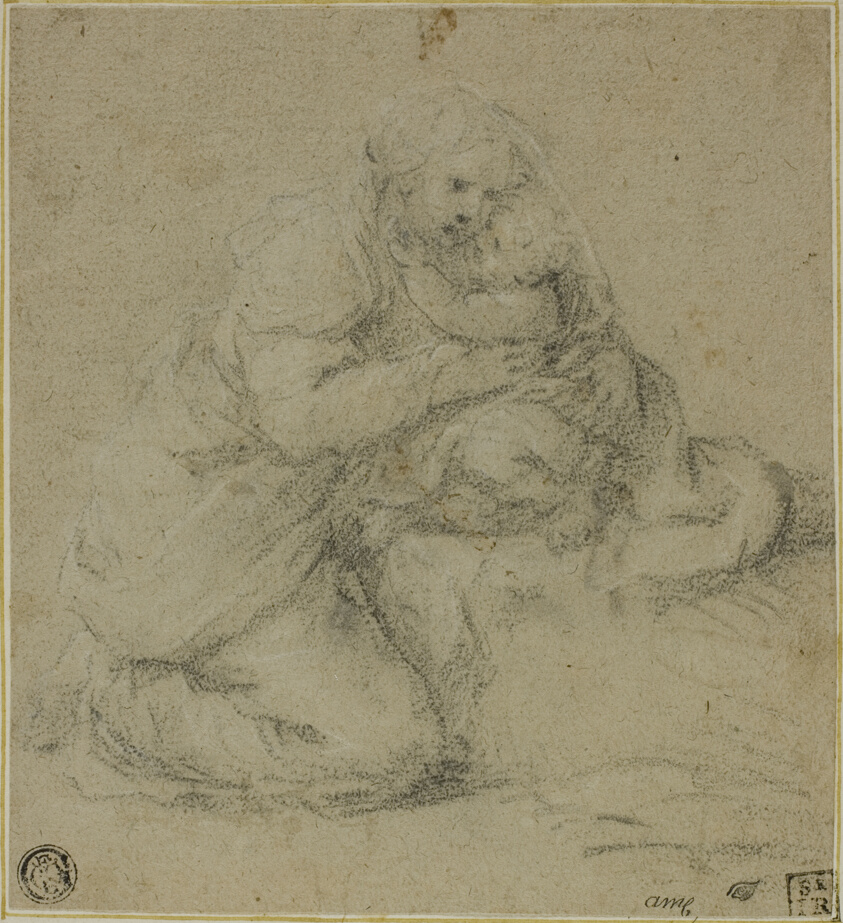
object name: Drawing and Watercolor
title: Kneeling Mother Embracing Child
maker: Attributed to Michelangelo Anselmi; Italian, c. 1492-1556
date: c. 1550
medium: Black chalk heightened with white chalk, on brown laid paper, laid down on ivory laid paper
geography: Italy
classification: chalk; drawings (visual works); prints and drawing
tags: mothers, children